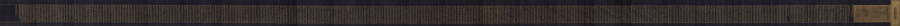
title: Avatamsaka Sutra No. 78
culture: Korea, Goryeo dynasty (918–1392)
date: 1300s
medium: Folded book with illustrated frontispiece; gold and silver on mulberry paper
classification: Bound Volume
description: This illuminated manuscript presents one part of the multivolume sacred text titled Avatamsaka (Flower Garland) sutra. Both the script and the image are rendered in gold ink on the smooth surface of the dark blue, indigo-dyed mulberry paper. This portion of the text, which reads from right to left, describes the encounter of the Buddha of the Future (Maitreya) and the young pilgrim Sudhana. The Buddha gives his words of wisdom to Sudhana, who asks questions about the path toward spiritual awakening. Mixed with ink and glue, the gold has a brilliance that strikingly reflects Sudhana’s ardent quest for understanding the way to reach enlightenment.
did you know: The pristine condition of this manuscript indicates that it was rarely used after its creation, revealing that the act of making a manuscript rather than reading it was the main religious goal.